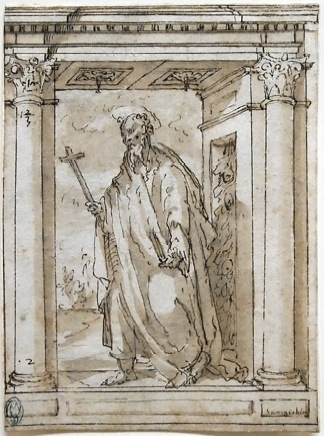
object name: Drawing and Watercolor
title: Standing Saint in Portico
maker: Unknown artist; Italian, second half of the 16th century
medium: Pen and brown ink and brush and brown wash, over traces of black chalk and graphite, on ivory laid paper, laid down on ivory laid paper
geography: Italy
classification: drawings (visual works); paper; prints and drawing